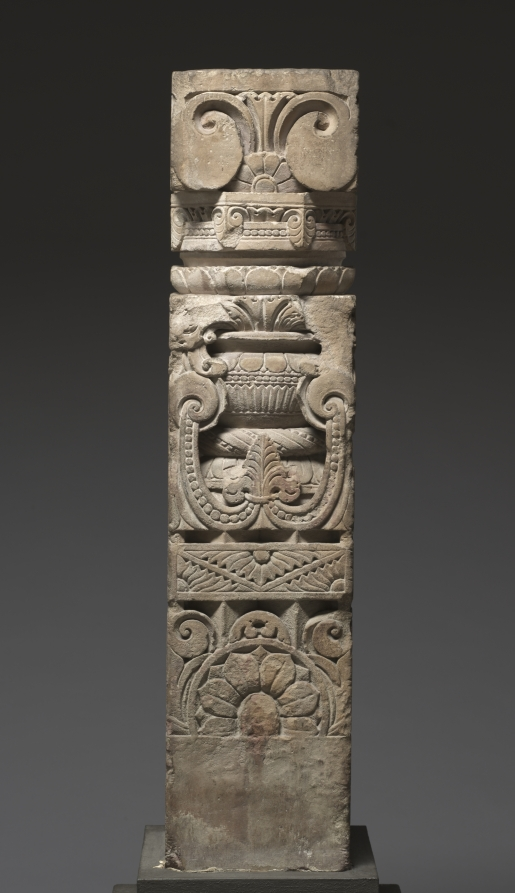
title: Monolithic Pillar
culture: Northern India, Mathura, early medieval period, 7th-8th century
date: 600s–700s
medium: red sandstone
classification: Sculpture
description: The central motif of this temple pillar is a pot, out of which vegetal forms exuberantly emerge, indicating bounty and abundance. The pot itself is decorated with lotus petals, leaves, and a band of pearls. The overflowing pot is a pervasive symbol in India to reference the prosperity and productivity that will result from worship and prayers at the holy site. It also symbolizes the auspiciousness and beauty of the created world.